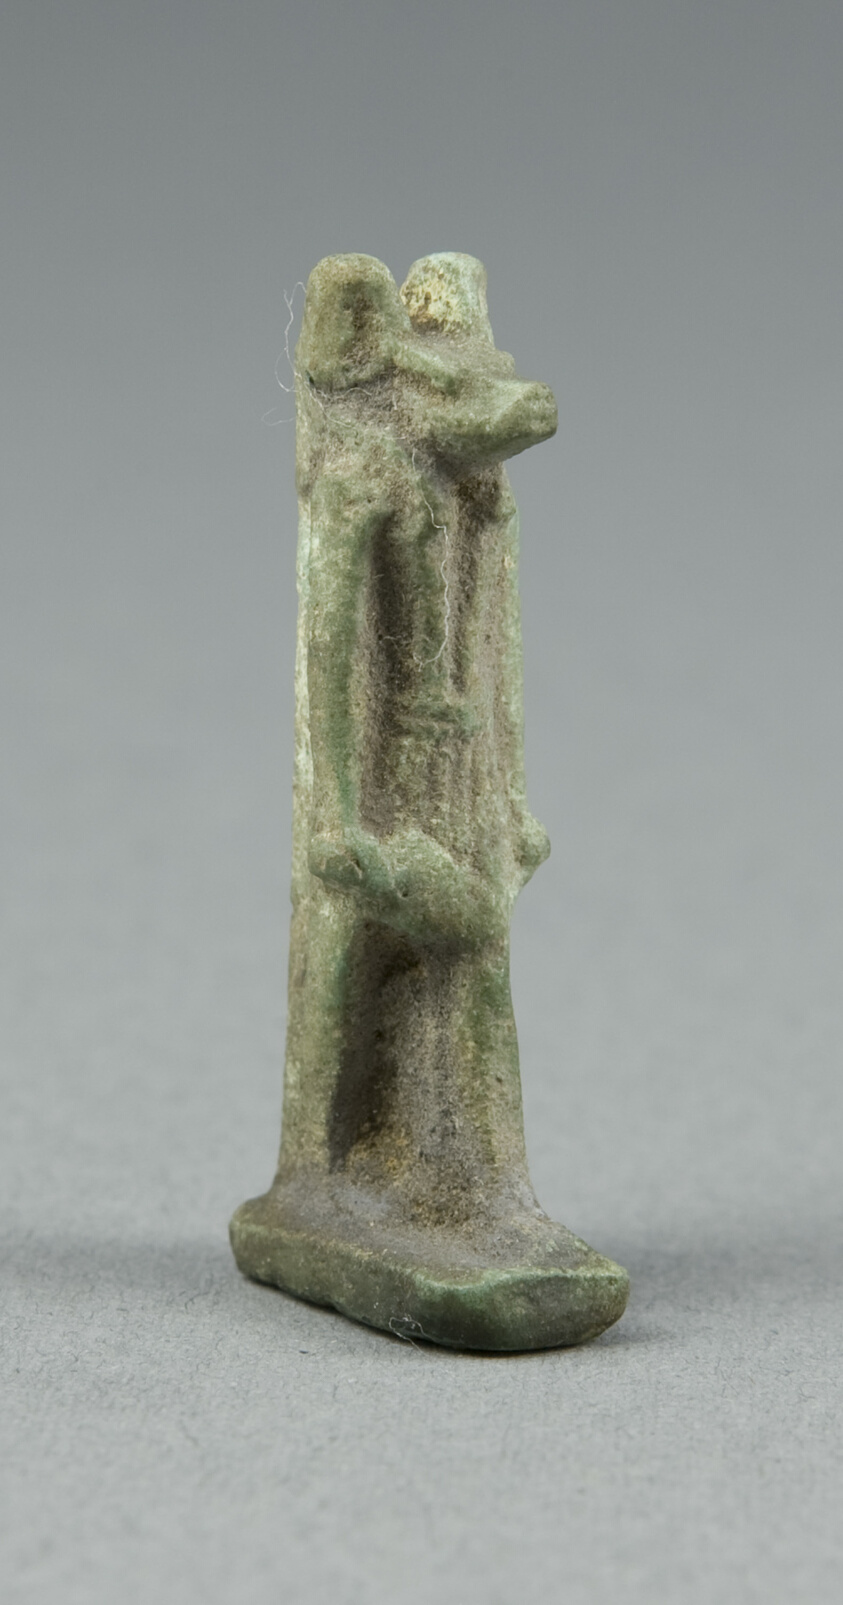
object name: Costume and Accessories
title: Amulet of the God Anubis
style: egyptian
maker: Egyptian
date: Late Period, Dynasties 26–31 (664–332 BCE)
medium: Faience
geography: Egypt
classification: amulet; jewelry; ceramics; ancient art; costume; faïence (composite material)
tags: gods (deities)